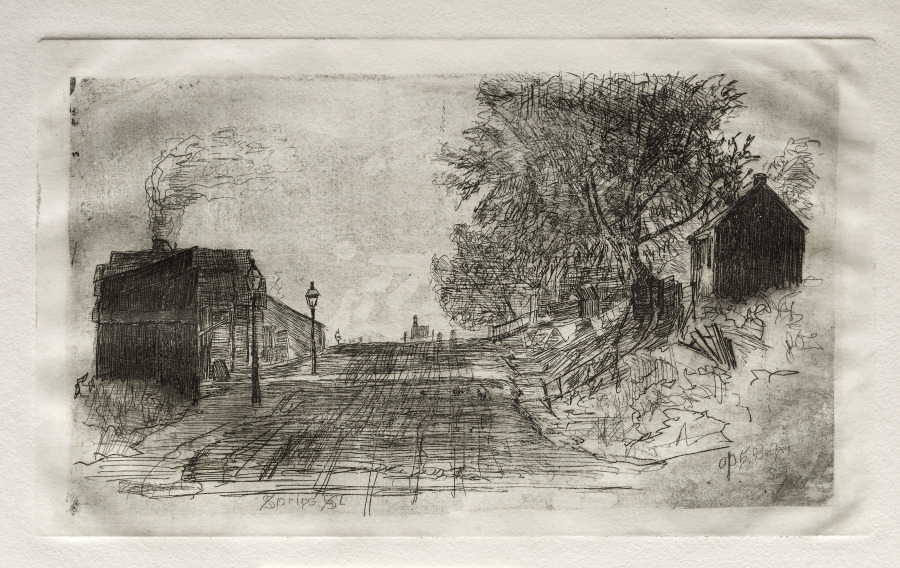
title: Spring Street, September 1878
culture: America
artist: Otto H. Bacher (American, 1856–1909)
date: 1878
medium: etching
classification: Print